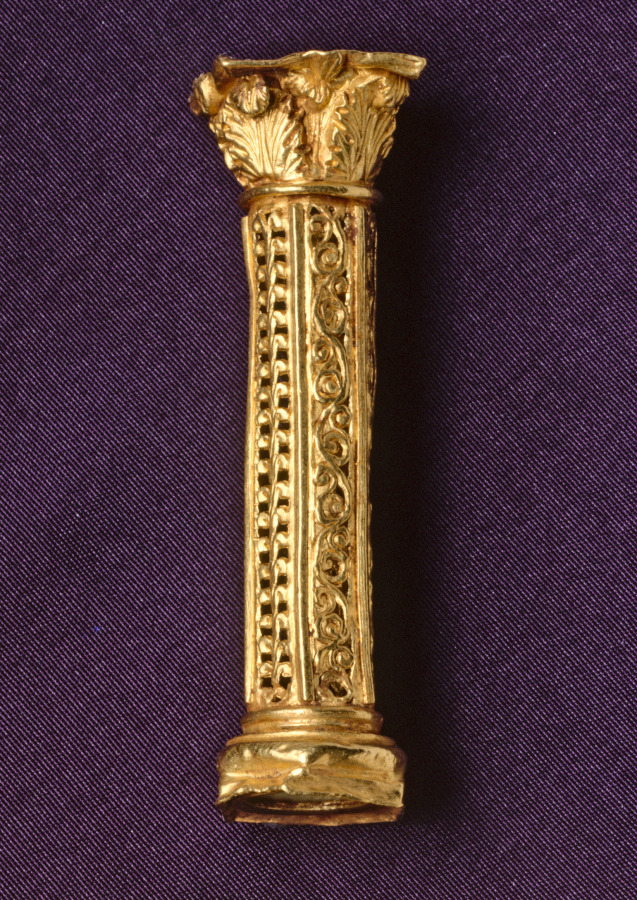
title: Spacer in the Form of a Corinthian Column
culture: Byzantium, Late Roman, Eastern Mediterranean, (probably Sirium or Nicomedia), Byzantine period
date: 324–26 CE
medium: gold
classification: Jewelry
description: Mounted at the center of this octagonal pendant is a rare coin issued by Constantine the Great, the Roman Empire’s first Christian emperor. Constantine’s portrait appears on the coin’s front, those of two of his sons on the back. Constantine’s image is surrounded by male and female busts, some of which are mythological figures. The pendant once formed the centerpiece of a sumptuous gold necklace, likely a gift for a high-ranking court official or member of the imperial family.